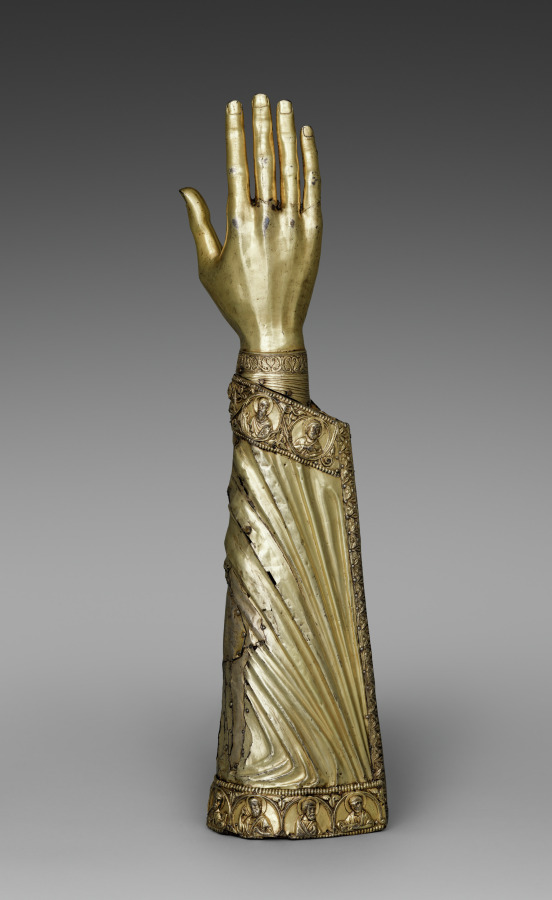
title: Arm Reliquary of the Apostles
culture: Germany, Lower Saxony, Hildesheim, Romanesque period, late 12th century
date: c. 1190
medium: gilt silver, champlevé enamel, oak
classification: Metalwork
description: Taking the form of a clothed lower arm with an outstretched hand, this reliquary from the Guelph Treasure appropriately enshrines a piece of an unidentified saint’s arm bone. Arm reliquaries like this one served as liturgical props; during religious services and processions, the clergy used them to bless and touch the faithful, thus making the presence of the saint more palpable and immediate. The apostle busts that decorate this arm reliquary seem to indicate that the relic it contains is that of an apostle. Duke Henry the Lion, a major patron of the church of Saint Blaise, is known to have received such relics from the Byzantine emperor Manuel I (1143-1180) upon his return from a pilgrimage to Jerusalem.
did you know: Reliquaries were prized not for the opulence that you see, but for the items that they held. They enshrined items associated with saints, like a piece of clothing they wore or a small portion of their remains. In this case, an arm bone is encased within.